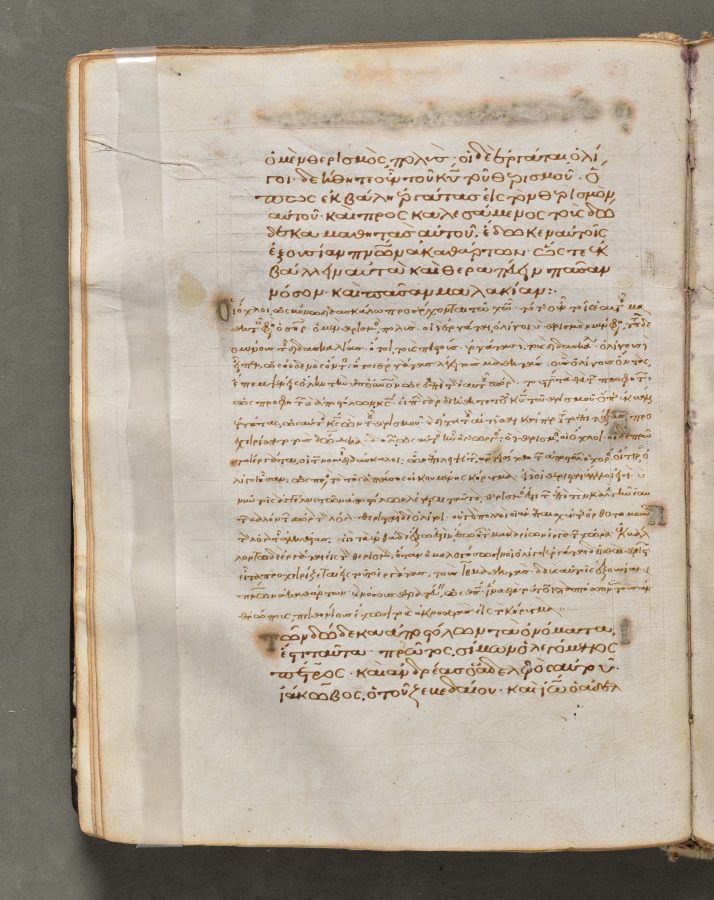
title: Text, folio 41 (verso), from a Gospel Book with Commentaries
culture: Byzantium, Constantinople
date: c. 1000–1100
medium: ink, tempera, and gold on vellum; leather binding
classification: Bound Volume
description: Each of the four gospels in this book opens on a page with brilliantly illuminated borders depicting the author of the text as well as birds-principally peacocks, symbols of the immortality of the soul-and fountains, representing the fountain of life and the salvation of the soul. This volume consists of 428 leaves with texts in Greek. Its level of sophistication suggests that it was probably written and decorated in a monastery in Constantinople.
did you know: Gospel Books were carried in procession through Byzantine churches.